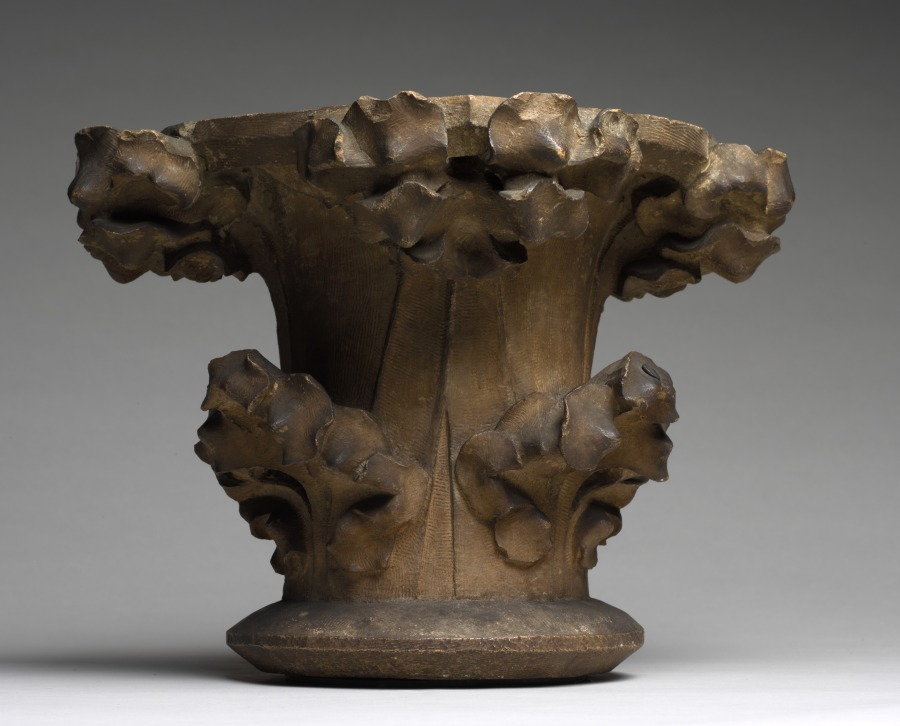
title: Column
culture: France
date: 1200s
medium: stone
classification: Sculpture